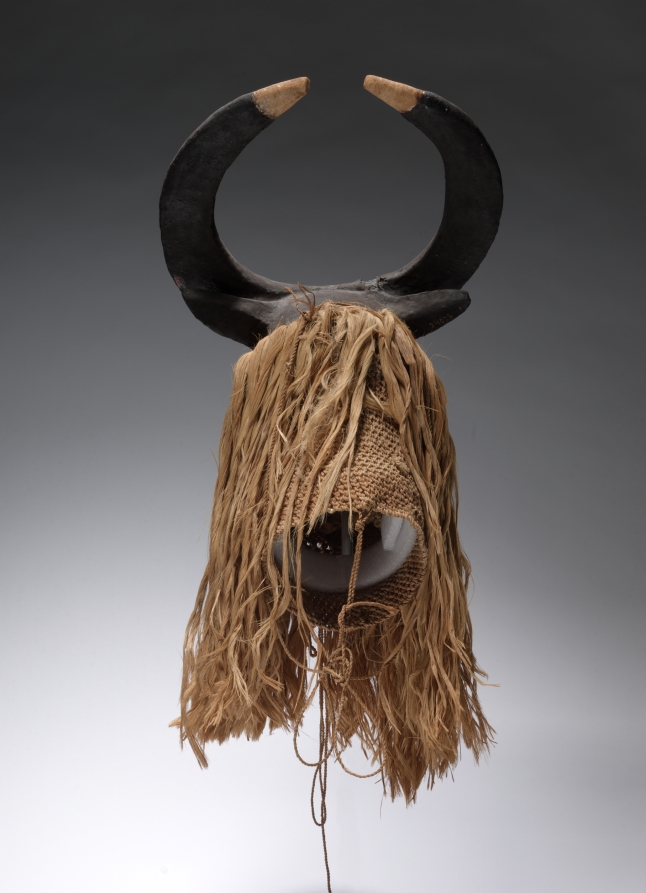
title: Buffalo Mask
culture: Africa, West Africa, Burkina Faso, possibly Bwa-style maker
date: early to mid-1900s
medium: Wood, plant fibers, paint, and iron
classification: Mask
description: Among the Bwa people, masks with human, animal, and fantastic traits typically represent protective bush spirits. This mask’s horns and muzzle identify it as a bush buffalo. Masked dancers appear during the dry season for initiations, funerals of elders, market days, harvest celebrations, and annual renewal rituals to protect the well-being of the community.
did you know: Once broken, the right horn of this mask was repaired; this indicates that it was valued.